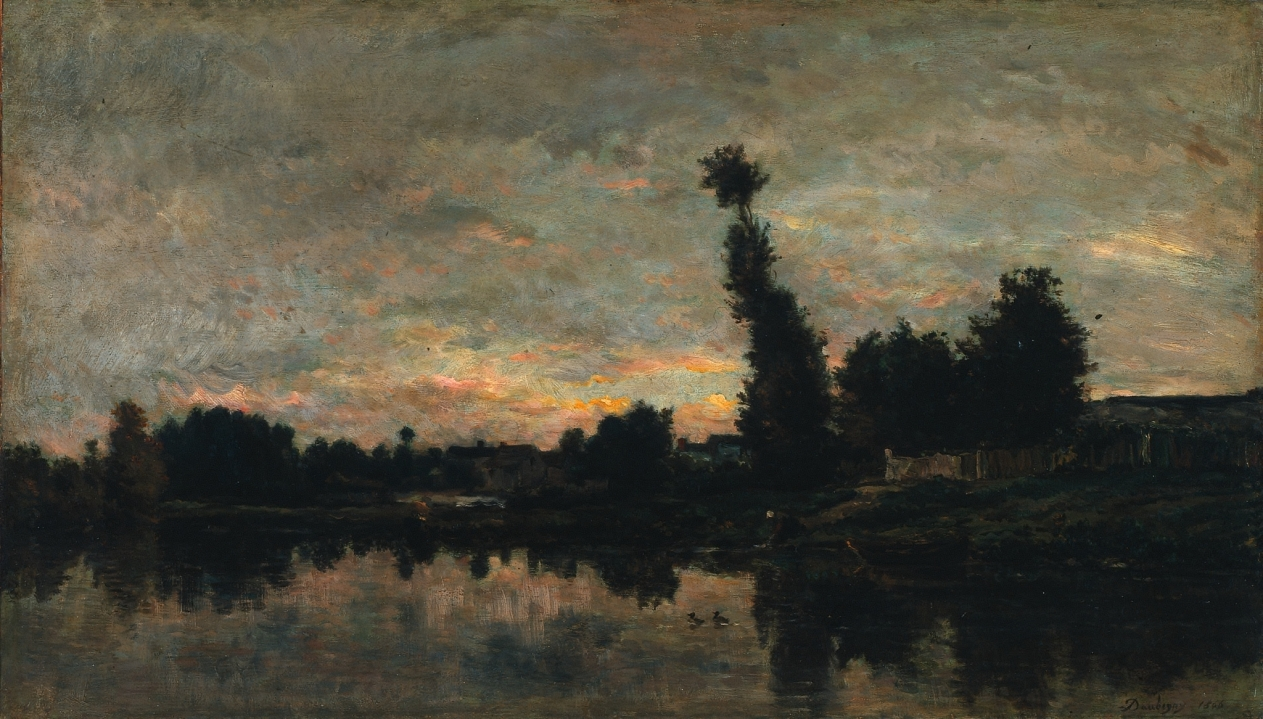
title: Sunset on the River Oise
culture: France, 19th century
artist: Charles François Daubigny (French, 1817–1878)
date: 1866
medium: oil on wood panel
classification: Painting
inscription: Signed in lower right: Daubigny 1866.